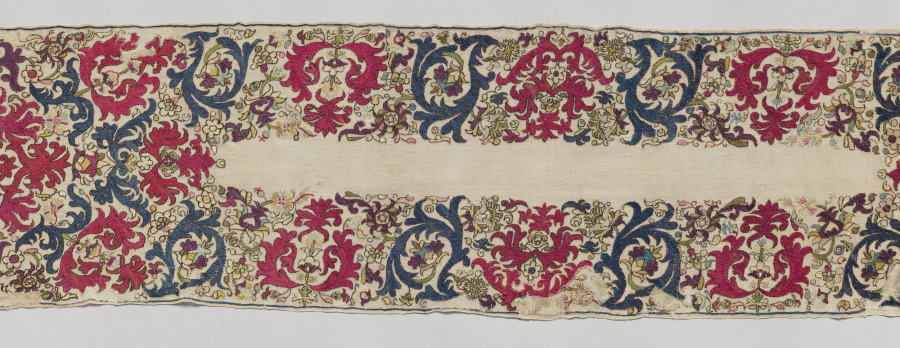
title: Headkerchief (tensifa)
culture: Africa, North Africa, Algeria, Algerian embroiderer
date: 1700s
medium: Linen, silk, gold, silver, dye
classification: Embroidery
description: This beautiful kerchief, worn wrapped around the head, was part of elegant bathing equipment that well-to-do women wore while relaxing in a hammam after bathing. The floral and foliate embroidery reflect a fashion that lasted for more than a century. This example is dominated by brilliant crimson and blue silk stitches.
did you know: This textile was displayed in the CMA’s first exhibition in 1916. While it is from North Africa, it was displayed in the "Nearer East" gallery.